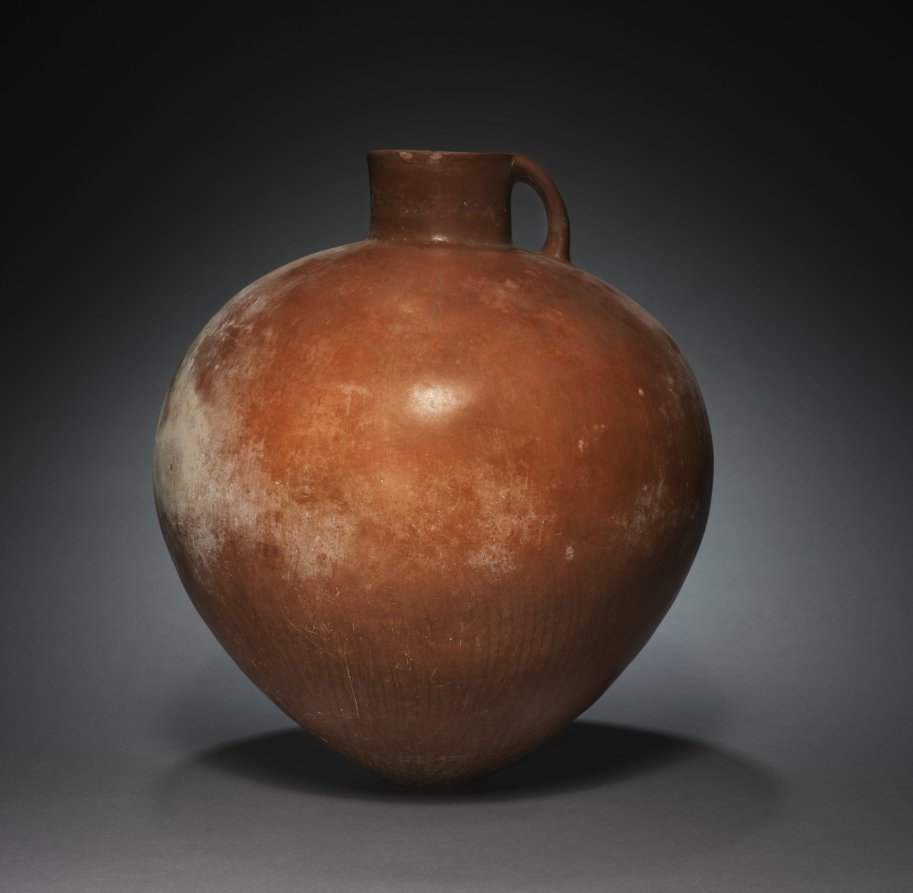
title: Red-Burnished Jug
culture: Iran, Amlash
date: 1000–700 BCE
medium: earthenware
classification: Ceramic